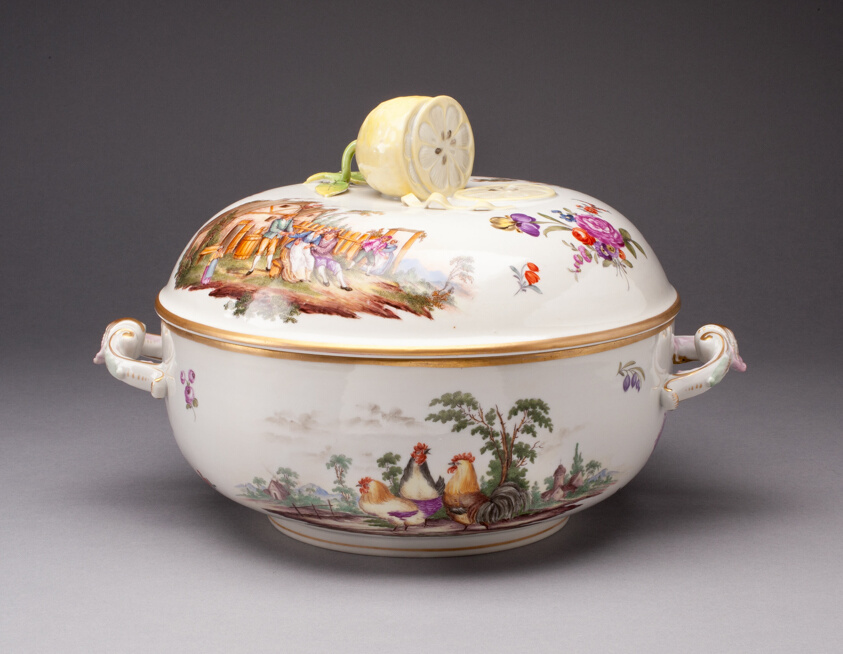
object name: Ceramics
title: Tureen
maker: Gotha Porcelain Factory (German, 1757-19th century)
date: c. 1783/1805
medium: Hard-paste porcelain, polychrome enamels, and gilding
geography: Gotha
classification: tableware; porcelain; european decorative arts; ceramics